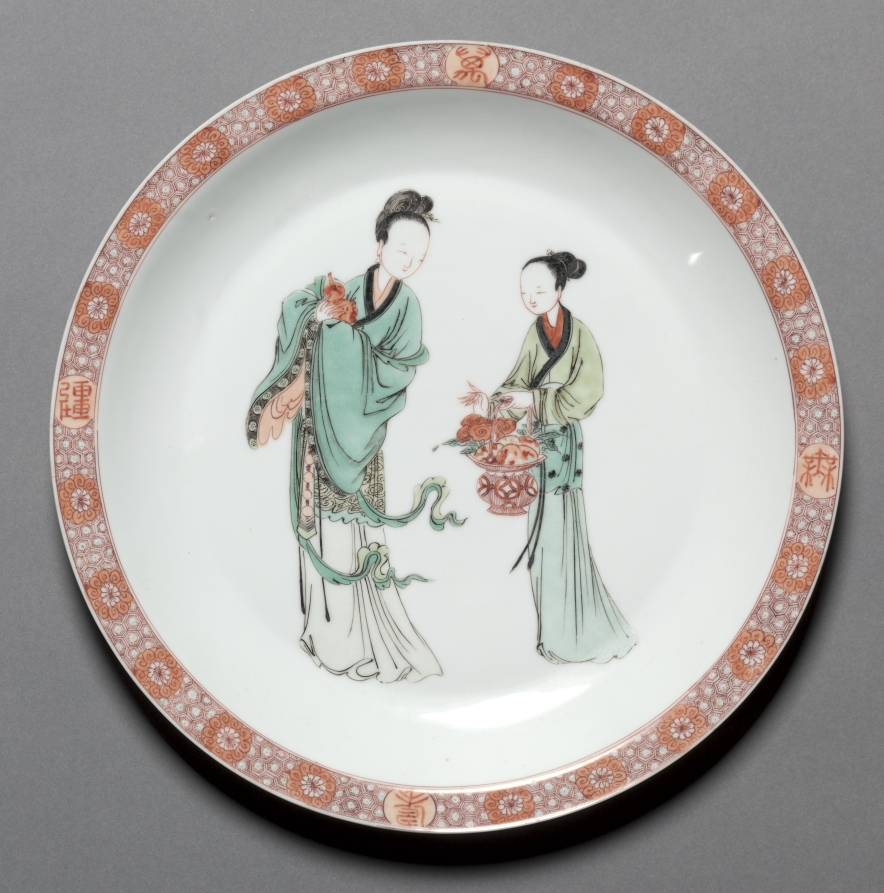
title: Dish with Female and Attendant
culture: China, Jiangxi province, Jingdezhen, Qing dynasty (1644-1911), Kangxi mark and period (1662-1722)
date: c. 1713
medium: porcelain with famille verte overglaze enamel decoration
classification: Ceramic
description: On the flattened rim of this dish is a band of ironred enamel decoration with the Chinese characters Wanshou wujiang, meaning "Long life without limit." This piece belongs to a set of particularly fine porcelains with the same inscription, which are thought to have been made for the Kangxi emperor's 60th birthday in 1713.